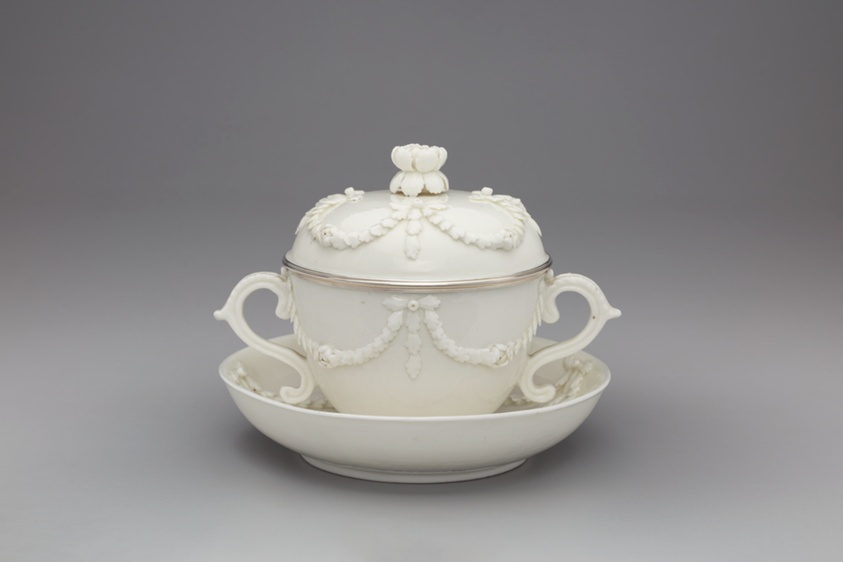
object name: Ceramics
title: Covered Bowl and Stand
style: Neoclassicism, 18th Century, Classical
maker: Mennecy Factory (France, 1750-73)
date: c. 1750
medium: Soft-paste porcelain and silver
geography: Mennecy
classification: mennecy; blanc de Chine; european decorative arts; porcelain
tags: sugar, sugar bowl, tea, tea service